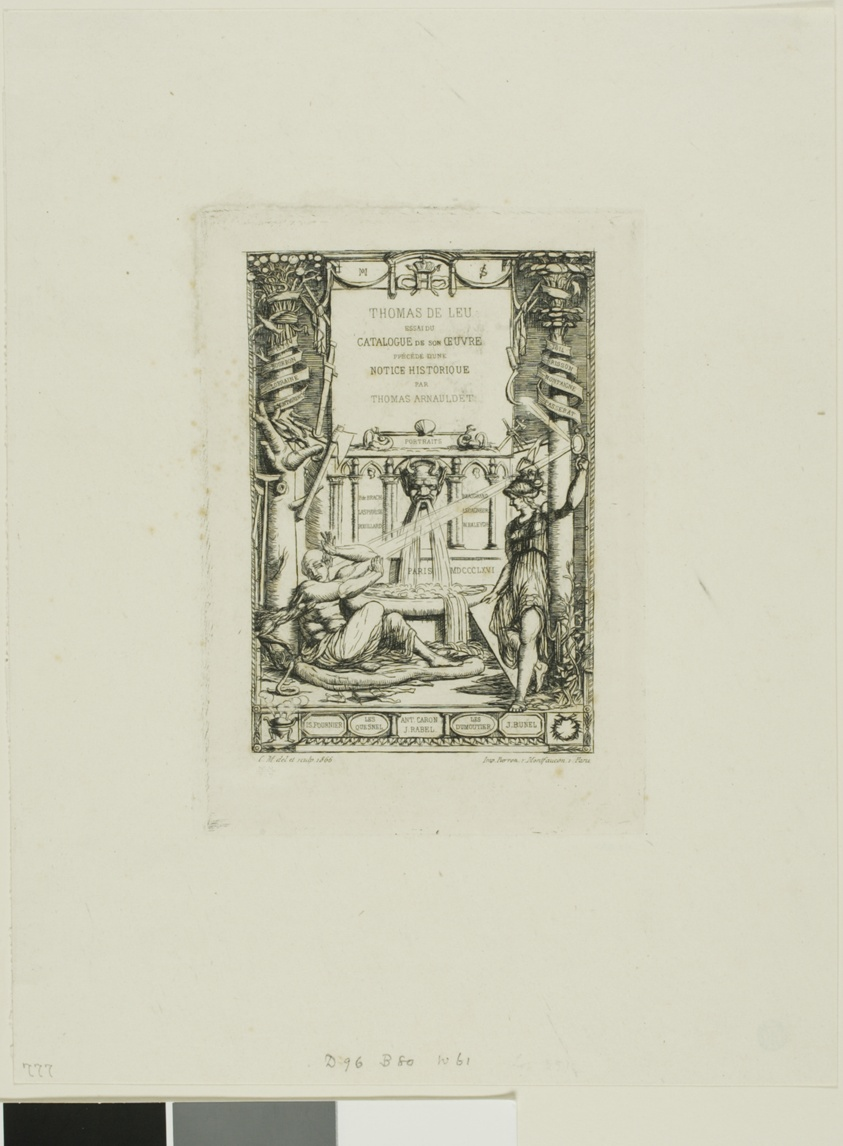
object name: Print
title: Frontispiece for the Catalogue of the Work of Thomas De Leu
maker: Charles Meryon (French, 1821-1868); printed by Pierron (French, 19th century)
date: 1866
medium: Etching and engraving on ivory laid paper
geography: France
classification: etching; print; prints and drawing